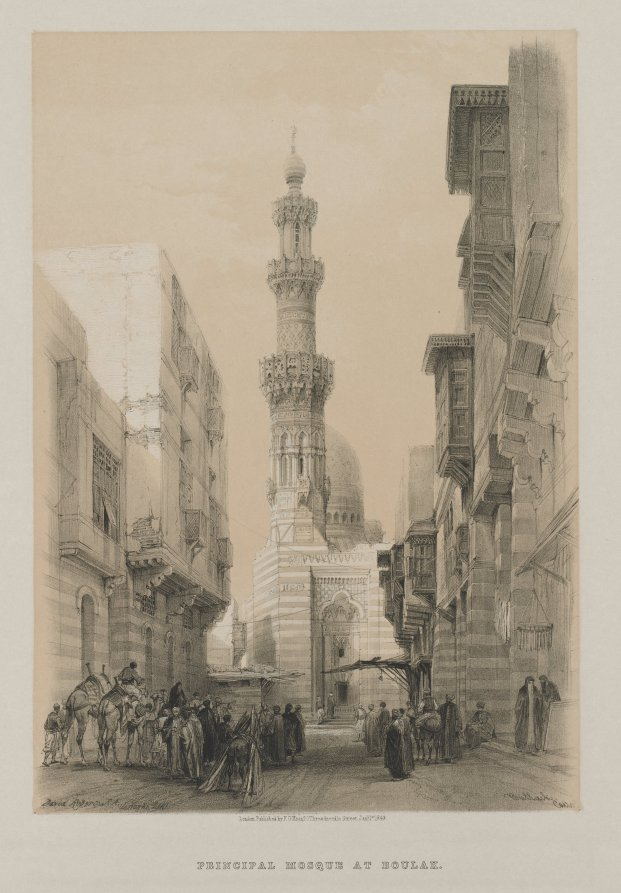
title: Egypt and Nubia, Volume III: Bullack, Cairo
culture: England, 19th century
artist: Louis Haghe (British, 1806–1885)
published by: F. G. Moon, 20 Threadneedle Street, London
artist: after David Roberts (Scottish, 1796–1864)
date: c. 1846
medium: color lithograph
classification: Print